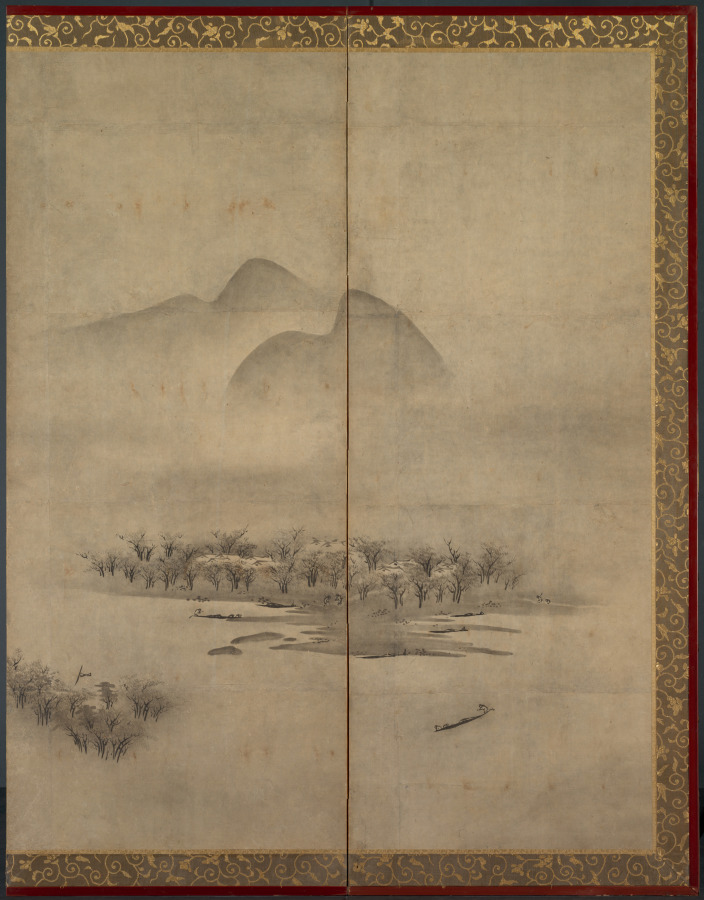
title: Moonlit Landscape (one of a pair)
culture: Japan, Muromachi period (1392–1573)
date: late 1500s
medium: six-panel folding screen, ink on paper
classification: Painting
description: This unsigned and unsealed composition includes imagery from the Eight Views of the Xiao and Xiang Rivers. Scanning the composition from right to left, four of the Eight Views subjects appear: sunset glow over a fishing village, returning sails off a distant shore, autumn moon over Lake Donting, and evening bell from a mist-shrouded temple. Not all the elements of the traditional Eight Views theme are here, but the artist suggests its literary presence by leading the viewer through a summer’s journey from one day to the next, aided, like the travelers in the landscape, by the light of the moon.